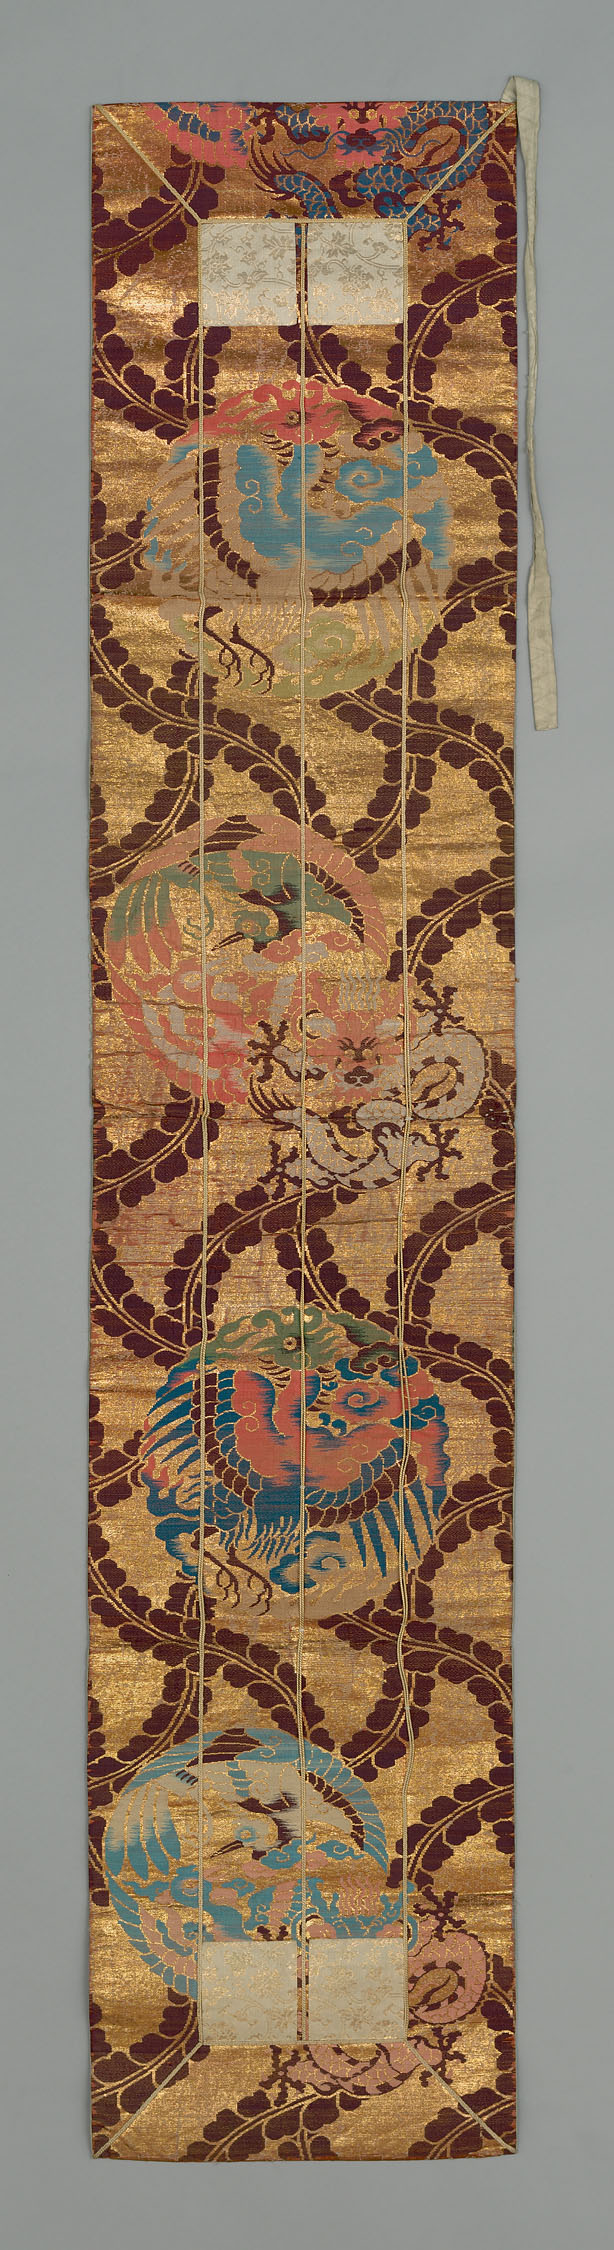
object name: Textile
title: Ôhi (Stole)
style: meiji, Japanism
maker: Japan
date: Late 19th century, Meiji period (1868–1912)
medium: Silk and gilt-paper strip; twill weave with secondary binding warps and supplementary patterning wefts with couched plied silk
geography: Japan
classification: textile; weaving; liturgical - buddhist